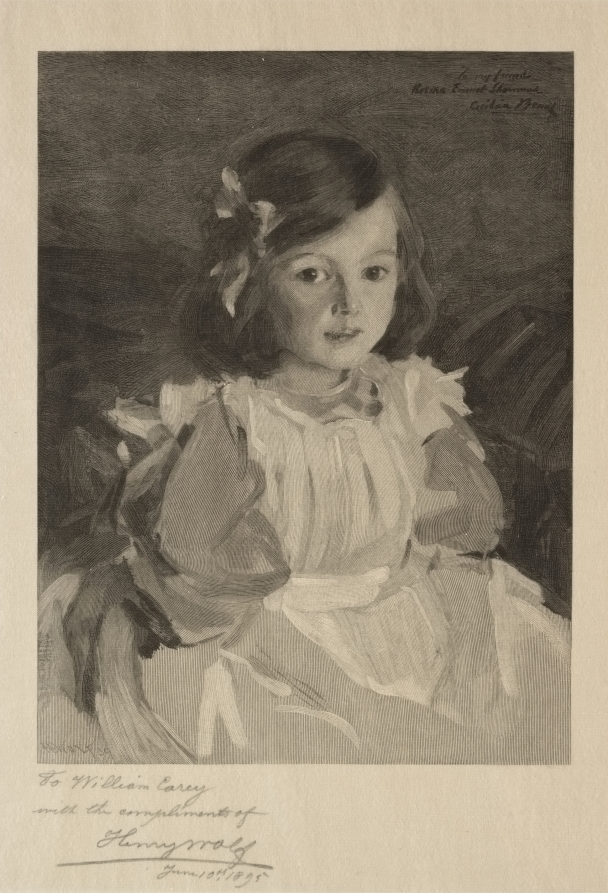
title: Cynthia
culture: America, late 19th-early 20th century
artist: Henry Wolf (American, 1852–1916)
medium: wood engraving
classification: Print